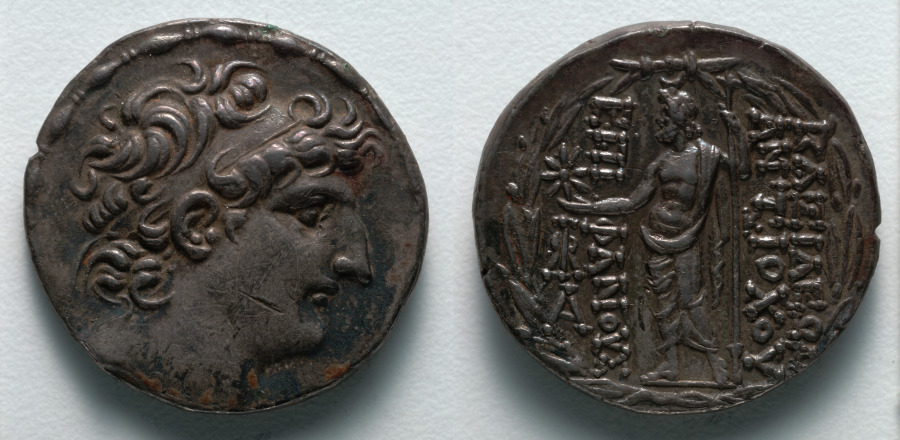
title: Tetradrachm: Head of Antiochos VIII (obverse); Zeus Ouranios (reverse)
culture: Greek, Seleukid, minted at Antioch (Syria), reign of Antiochos VIII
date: 112–110 BCE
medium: silver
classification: Coins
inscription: ΒΑΣΙΛΕΩΣ | ΑΝΤΙΟΧΟΥ | ΕΠΙΦΑΝΟΥΣ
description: Like his ancestors before him, Antiochos VIII emulates the style of Alexander III (the Great) on this coin, preferring wild, curly hair, a simple diadem, and clean-shaven face. On the reverse Zeus Ouranios gives his divine approval, standing with a scepter and bright star that shines above two mint marks in a very crowded field.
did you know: The coins of Antiochos VIII are distinguished by his extremely hooked nose and pudgy face.